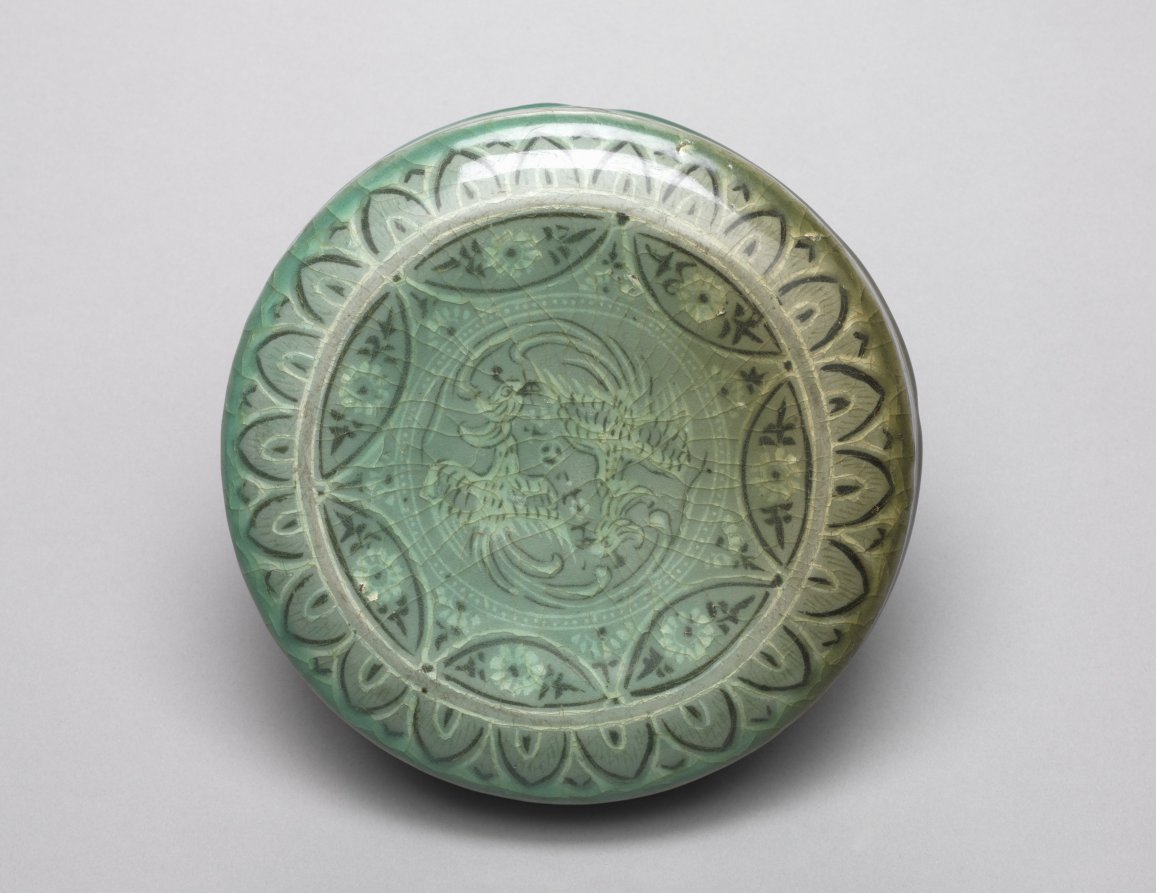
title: Box and Cover with Inlaid Phoenix Design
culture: Korea, Goryeo dynasty (918–1392)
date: 918–1392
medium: earthenware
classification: Ceramic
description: Celadons, spoons, seals, and bronze mirrors were the most common burial objects in tombs during the Goryeo period (918–1392). Once used to contain colored powder, rouge, and eyebrow gel for makeup, this small container was one of the standard goods that furnished elites' tombs. Both women and men used the grain powder of rice or millet for whitening their skin, safflower extract for rouge, and plant ash or soot for eyebrow gel. Yet, natural-looking makeup seems to have been the most favorable one in Korea according to the travelogue by Xu Jing (1091–1153), the Chinese diplomat who visited Korea in 1123.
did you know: This lidded ceramic container was used to store either incense or cosmetics.